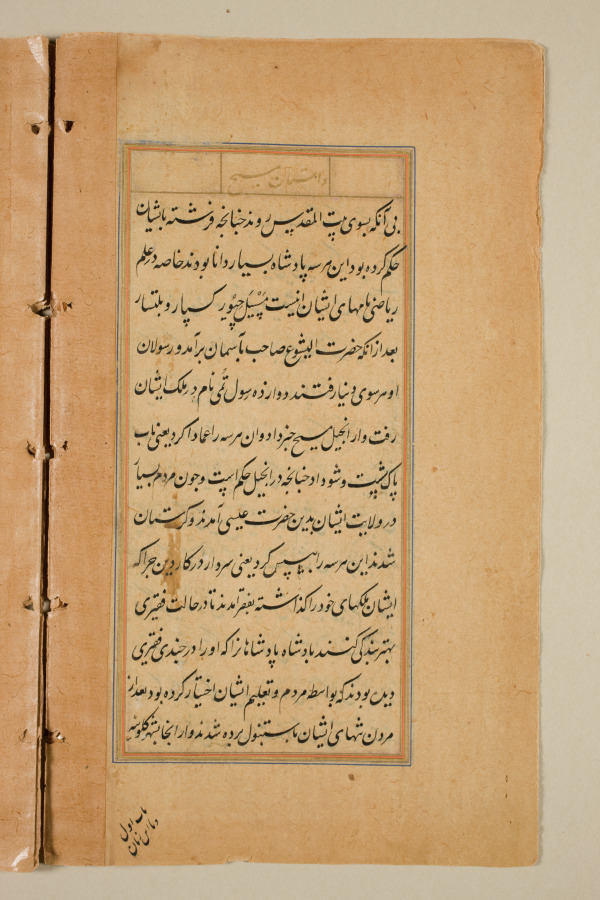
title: Text page from a Mirror of Holiness (Mir’at al-quds) of Father Jerome Xavier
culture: Mughal India, Allahabad, made for Prince Salim (1569–1627)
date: 1602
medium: Ink and gold on paper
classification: Manuscript